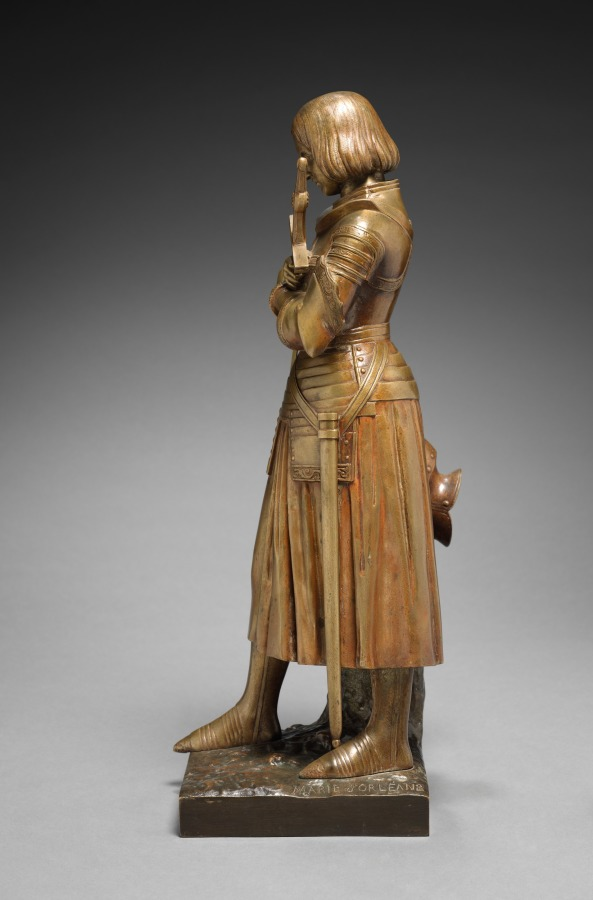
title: St. Joan of Arc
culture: France, 19th century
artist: Princesse Marie-Christine d' Orleans (French, 1813–1839)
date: 1836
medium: bronze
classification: Sculpture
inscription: Signed on top of base: "Marie d'Orléans."; inscribed on left side of base: "Susse Fres Edts Paris."